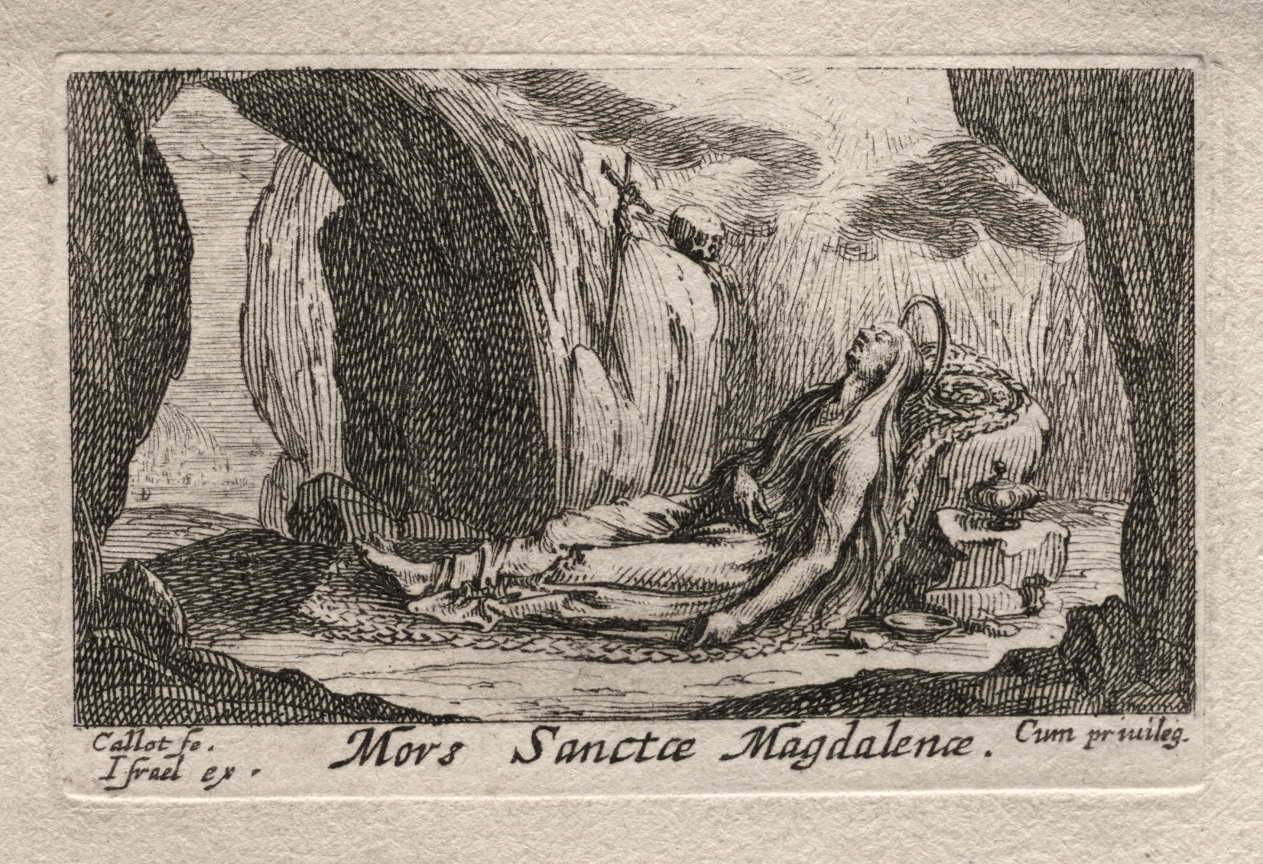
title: Les Penitents: Mort de Ste. Madeleine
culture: France, 17th century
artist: Jacques Callot (French, 1592–1635)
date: ca. 1632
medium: etching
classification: Print